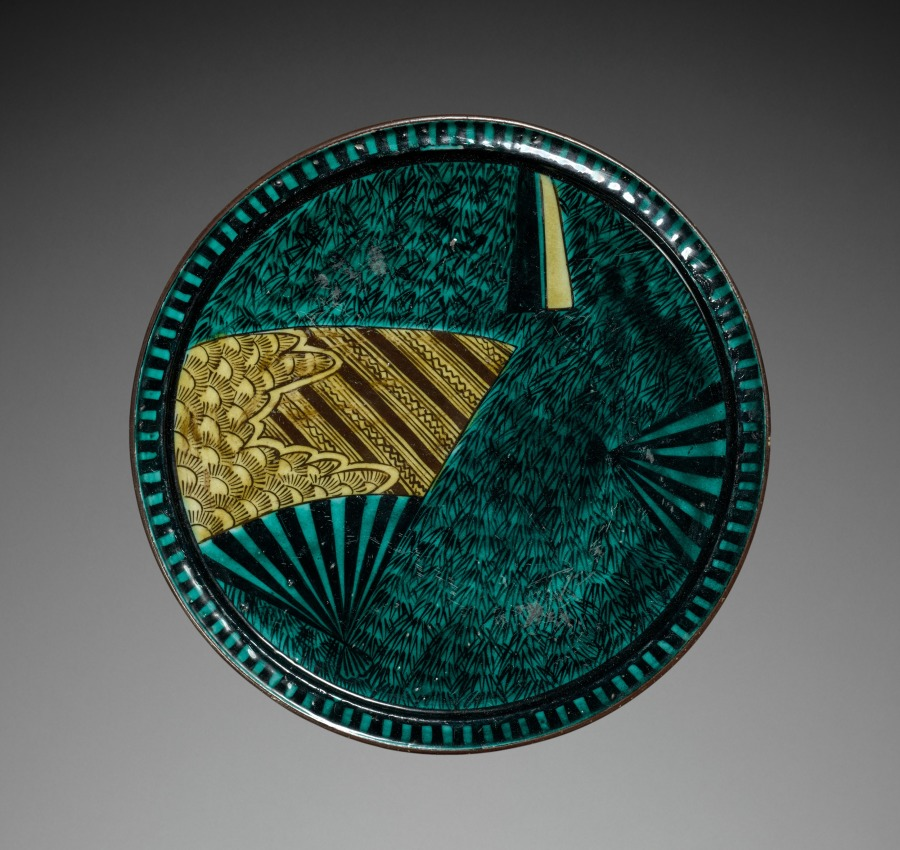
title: Plate with Fan Designs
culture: Japan, Edo period (1615–1868)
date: late 1600s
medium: porcelain with overglaze enamel decoration (Hizen ware, Ko-Kutani type)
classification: Ceramic